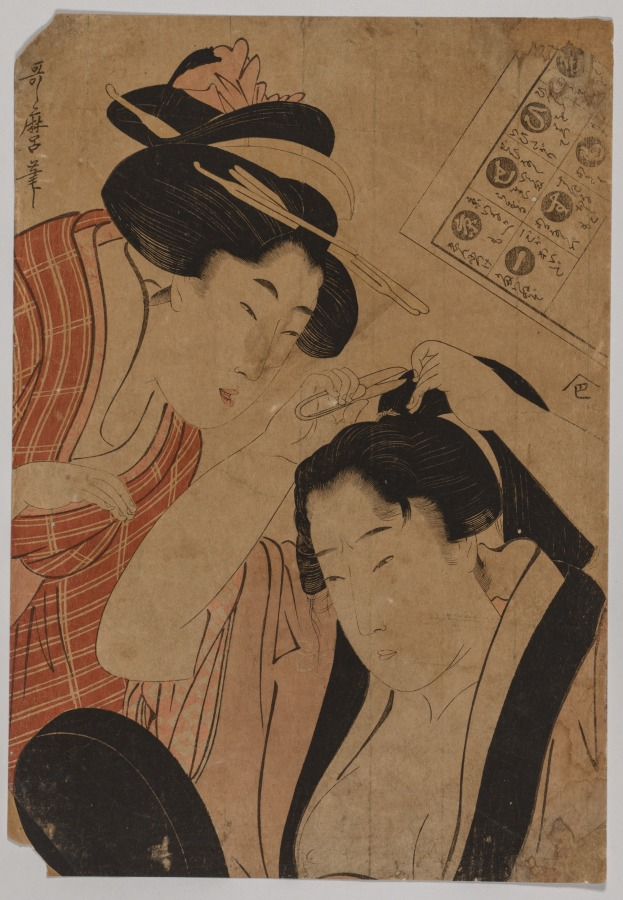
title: No Title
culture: Japan, Edo period (1615–1868)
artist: Kitagawa Utamaro (Japanese, c. 1754–1806)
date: 1753–1806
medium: color woodblock print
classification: Print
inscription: Signature: Utamaro fude